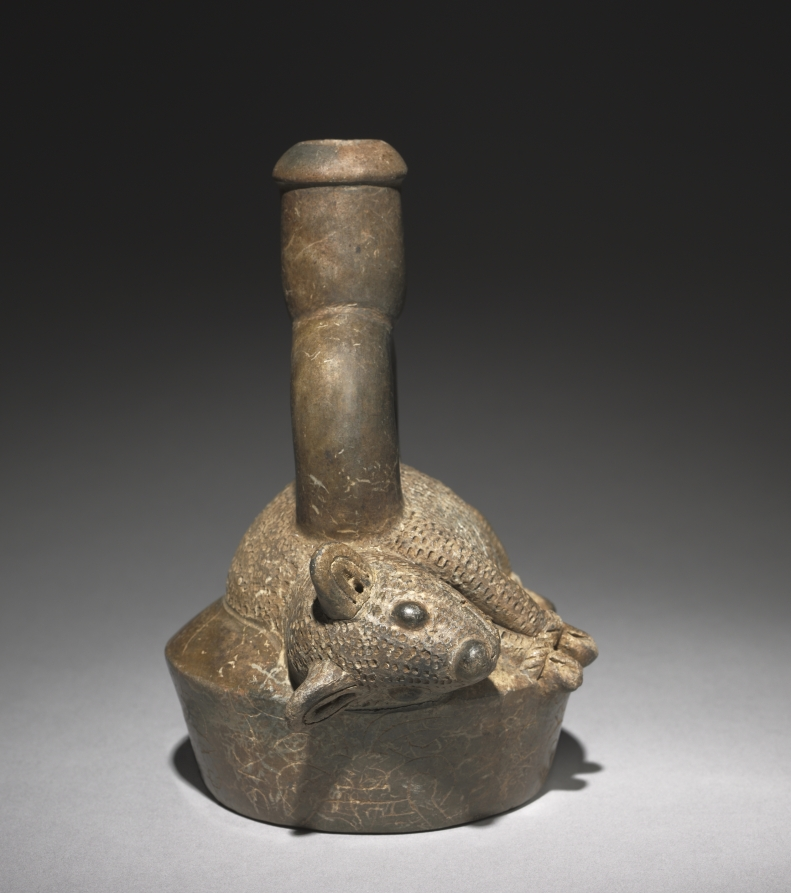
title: Vessel with Pudu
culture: Central Andes, North Coast, Chongoyape, Formative period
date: 500–200 BCE (thermoluminescence date, 1190–90 BCE)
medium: ceramic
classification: Ceramic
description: This bound pudu—a small reddish deer indigenous to the Andes—lies atop a chamber with fanged supernatural heads incised on the sides. The animal may represent a sacrificial offering.